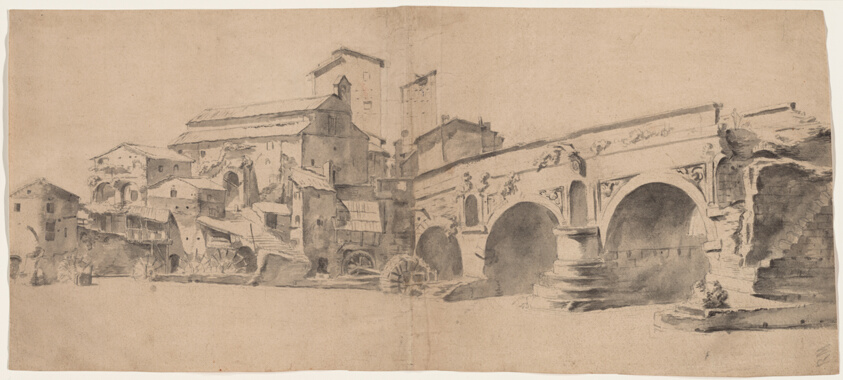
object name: Drawing and Watercolor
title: View of the Ponte Rotto, Rome, with Watermills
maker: Jan Asselijn (Dutch, c. 1610-1652)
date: late 1630s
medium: Watercolor, over graphite, on cream laid paper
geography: Netherlands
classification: wash; drawings (visual works); prints and drawing